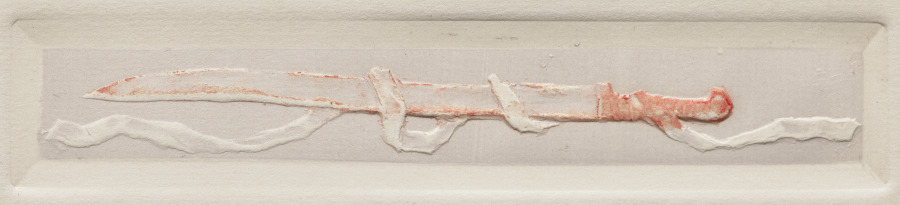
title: Decorative Knife Motif/ Dancing Woman with Arms in Pushing Gesture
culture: France, early 20th Century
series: La Loïe Fuller, by Roger Marx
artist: Pierre Roche (French, 1855–1922)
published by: Les Cents Bibliophiles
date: 1904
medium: gypsograph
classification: Bound Volume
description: Although best known as a sculptor, Roche was a versatile and prolific artist who worked in many mediums. Loïe Fuller, the pioneer of modern dance who took Paris by storm in 1892, was one of his favorite subjects. He portrayed her in clay, bronze, marble, plaster, and in a series of gypsographs that illustrated an essay by the art critic Roger Marx. The book was described as "a precious monument to Loïe Fuller."